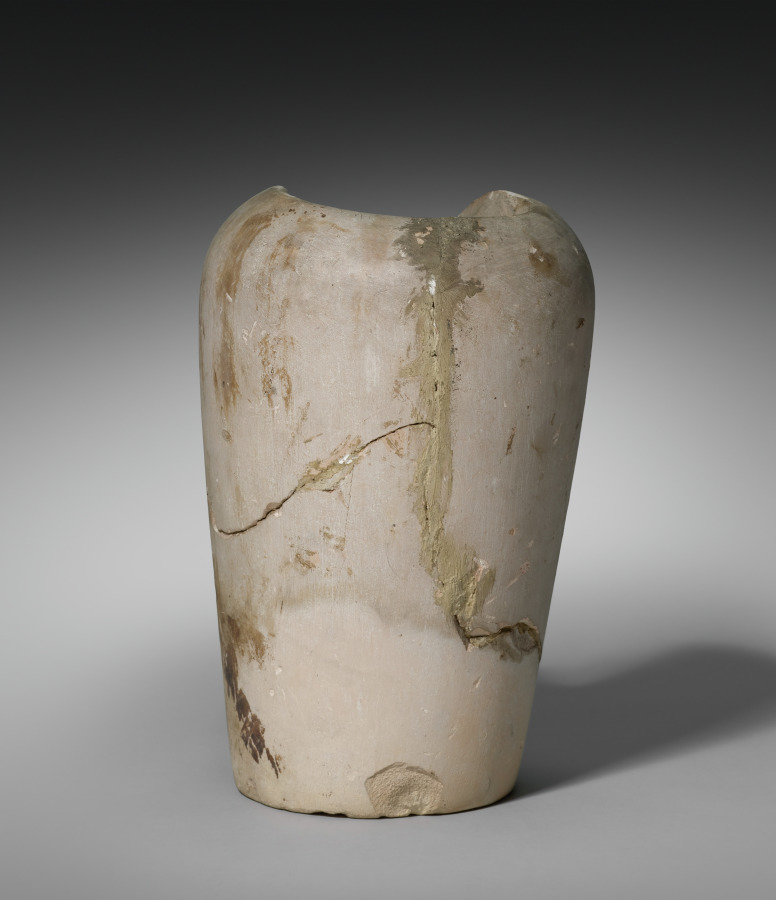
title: Canopic Jar with Lid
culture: Egypt, New Kingdom (1540–1069 BCE), Dynasty 18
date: 1540–1296 BCE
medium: limestone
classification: Funerary Equipment